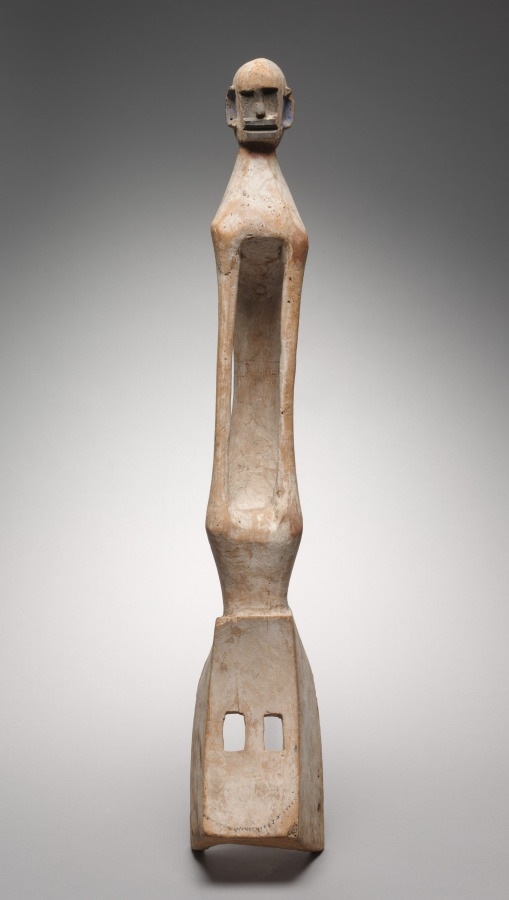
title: Mask (Omono or Tana Wurum Bogoro)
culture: Africa, West Africa, Mali, Dogon-style blacksmith-carver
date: early 1900s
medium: Wood and paint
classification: Mask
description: Dogon masks can be interpreted on two fundamentally different levels: “front speech” (giri so) reflects an early stage of knowledge and consists of a tale that is intended to arouse curiosity; and “speech of the world” (aduno so) refers to Dogon cosmogony, reserved for highly instructed men and women. Masked dances have recently been organized in Dogon regions for tourists and dignitaries. The character of omono is a rare one among the 80 or so that appear in Dogon masquerades.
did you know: The long-armed figure at the top of this mask is omono, a white-bellied monkey.